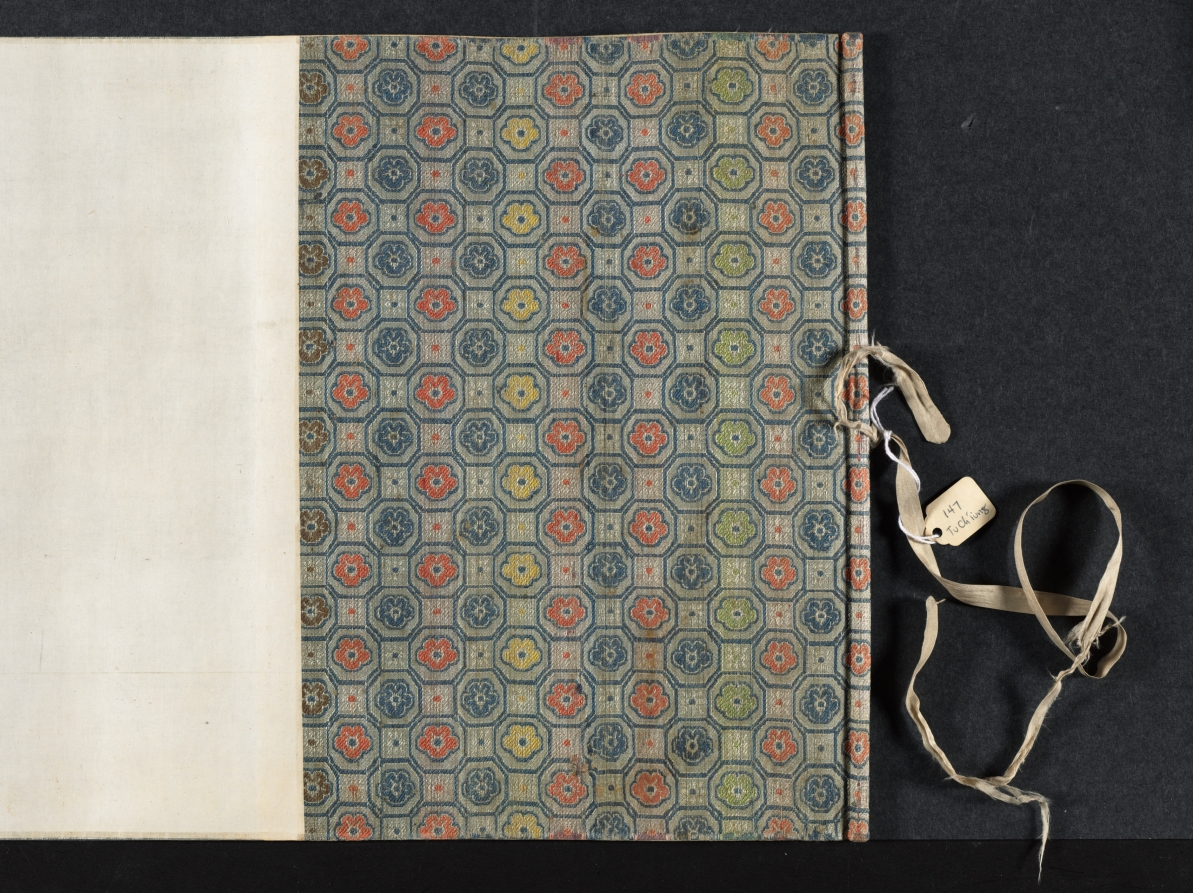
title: Mt. Taibo in the Style of Wang Meng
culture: China, Ming dynasty (1368–1644)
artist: Du Qiong (Chinese, 1396–1474)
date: 1442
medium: handscroll; ink and light color on paper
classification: Painting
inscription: Artist's inscription, signature, and 11 seals: [1 seal] Tung-yüan chai. Huang-ho-shan-ch'iao [Wang Meng] painted a painted called T'ai-po Mountain. Its brushwork is superior and admirable, which is very close to Yu-ch'en [Wang Wei, 699-759]. The cleverness of its composition, the maple groves and rustic temples, the inaccessible ravines and autumnal plateaus, the periolous peaks and strange rocks, etc., all seem to be so natural. The paper is only a little over eight feet, but the landscape has the range of a thousand miles. Once you open and note the contents, it is as if one were roaming among the mountain peaks enveloped in mist and clouds, and forgot the dusty world. When I first saw this, I was so mixed with excitement and joy that I could not take my hands off the painting. So I put it on the table, and tried my best to imitate it, forgetting sleeping and eating for about three months before it was completed. Although I do not dare to tread in the footsteps of Huang-ho shan ch'iao, I took great pains to capture his spirit in composition and colors. I do not know whether it would pass the judgment of the experts. On the fifteenth day of the fifth month, the seventh year of the Cheng-t'ung year [1442], inscribed by Tung-yüan, Tu Chiung. [2 seals] Yung-chia; Ching-chieh ming-men. [8 seals on painting] Tung-yüan chai; Ching-chieh ming-men; Yung-chia; Tu Ch'iung yin; Tung-yüan (repeated 5 times). trans. WKH/LYSL 3 colophons and 7 additional seals: 1 colophon and 2 seals of Chou Ting (1401-1487); 1 colophon and 2 seals of Wu K'uan (1435-1504); 1 colophon, dated 1655, and 2 seals of Lan Ying (1585-after 1664).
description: When a Chinese painter "imitated" a painting by a past master, the intention was never to produce an exact copy. Du Qiong, the Ming painter from Suzhou, is a case in point. The painting style of this handscroll is actually closer to that of Huang Gongwang (1269–1354) than to the style of Wang Meng (about 1301–1385). Both masters were active during the previous dynasty and are among the so-called Four Great Masters of the Yuan dynasty (1279–1368). In this painting, the interplay of styles, including Du Qiong's own, contribute to an inner dimension that is more than visual. Mt. Taibo is located in the province of Zhejiang and is known for its scenic beauty. In this scroll, however, it is not depicted literally. The image is an ideal representation of mountains in southeastern China.